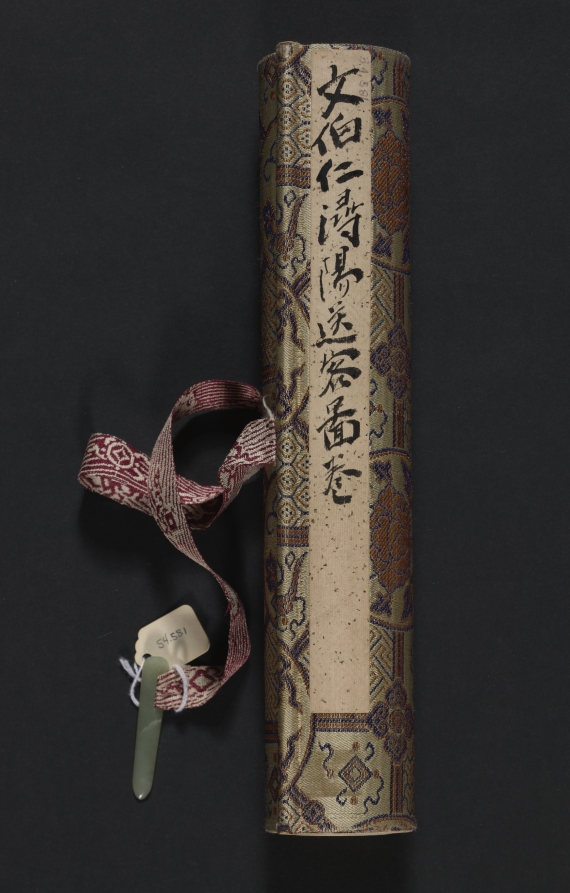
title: Saying Farewell at Xunyang (Song of the Pipa)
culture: China, Ming dynasty (1368–1644)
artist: Wen Boren (Chinese, 1502–1575)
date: 1500s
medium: handscroll, ink and color on paper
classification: Painting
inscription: "潯陽送客圖" 五峰山人文伯仁寫于停雲館中 [印] 文伯仁; 五峰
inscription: 2 colophons and 9 additional seals: 1 transcription of "Pipa xing 琵琶行” (Song of Pipa) and 3 seals of Zhu Yizun 朱彜尊 (1629-1709); 2 seals of Wu Rongguang 吳榮光 (1773-1843); 1 colophon, dated 1826, and 3 seals of Wu Xijia 吳錫嘉 (mid-1700s)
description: This handscroll depicts The Song of the Pipa, a poem by Bai Juyi 白居易 (772–846) written after the poet’s encounter with a pipa player on the Yangzi River. Expelled from her home city when her beauty and fame had faded, she played for the poet at night. Her musical performance and tragic life story resonated with Bai Juyi, who had just been demoted and exiled from life at court himself. The hazy, vast view and pale color tonalities of this painting illustrate these feelings of endless sadness, having lost one’s sense of purpose in life.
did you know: Wen Boren depicted the chilly autumn water with a fishnet pattern.